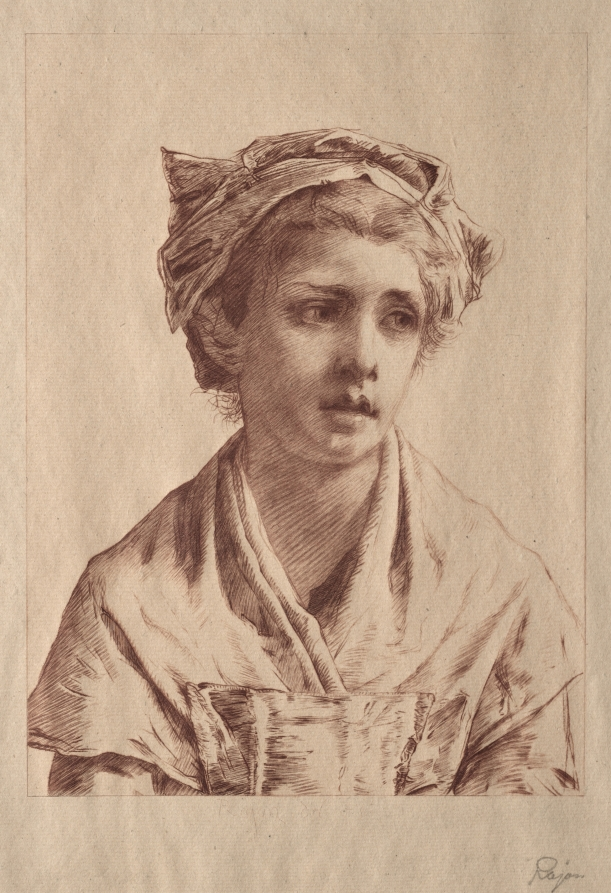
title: Ninette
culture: France, 19th century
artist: Paul Rajon (French, 1842/43–1888)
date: c. 1885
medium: etching printed in red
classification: Print